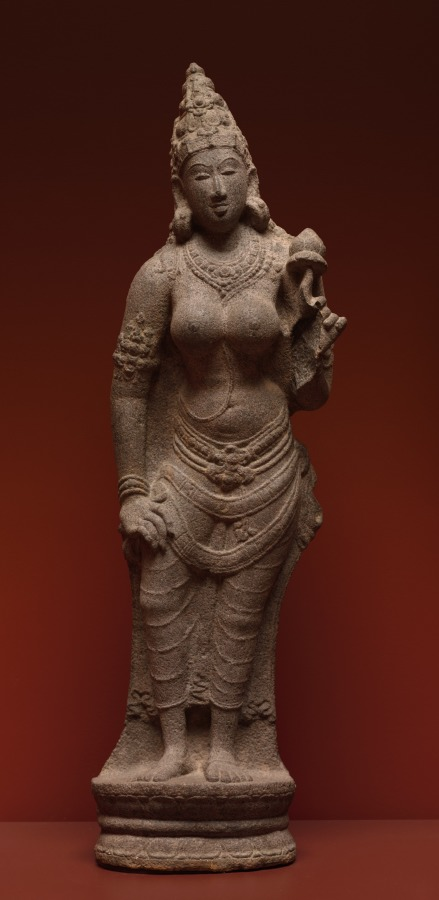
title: Bhu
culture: South India, Tamil Nadu, probably Pudokkatai, early Chola Dynasty, 10th Century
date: 900–950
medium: granite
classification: Sculpture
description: One of Vishnu's two wives, Bhu, the earth goddess, holds the lotus in her left hand.